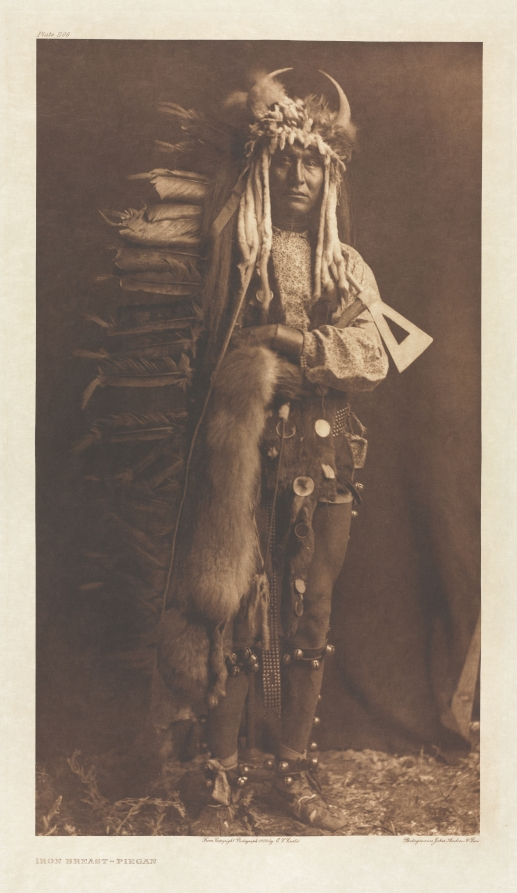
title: Portfolio VI, Plate 206: Iron Breast - Piegan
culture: America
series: The North American Indian: being a series of Portfolios picturing and describing the Indians of the United States, the Dominion of Canada, and Alaska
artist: Edward S. Curtis (American, 1868–1952)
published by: The University Press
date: 1900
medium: photogravure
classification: Portfolio